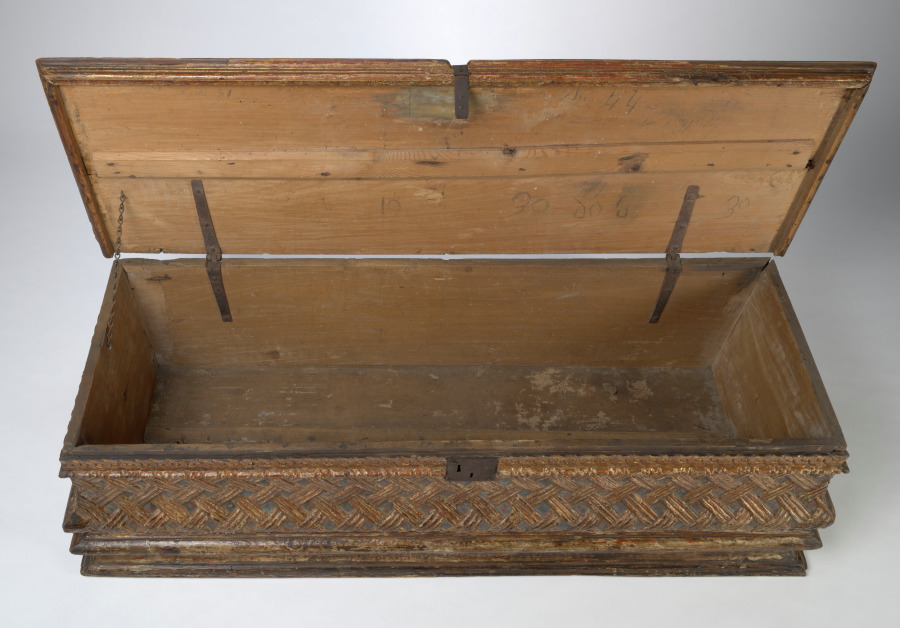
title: Cassone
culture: Italy, early 16th century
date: early 1500s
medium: walnut, painted and gilded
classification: Furniture and woodwork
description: Chests such as this were made in pairs and presented to young women on the occasion of their marriage. They not only provided storage space in the home for clothing and personal effects, but could also be used as a bench to sit on. It was not uncommon for any one room in a Renaissance palace to have several. This chest was in Savoy Castle, near Verzuolo, in the Piedmont region of northern Italy from the 1500s until 1922..